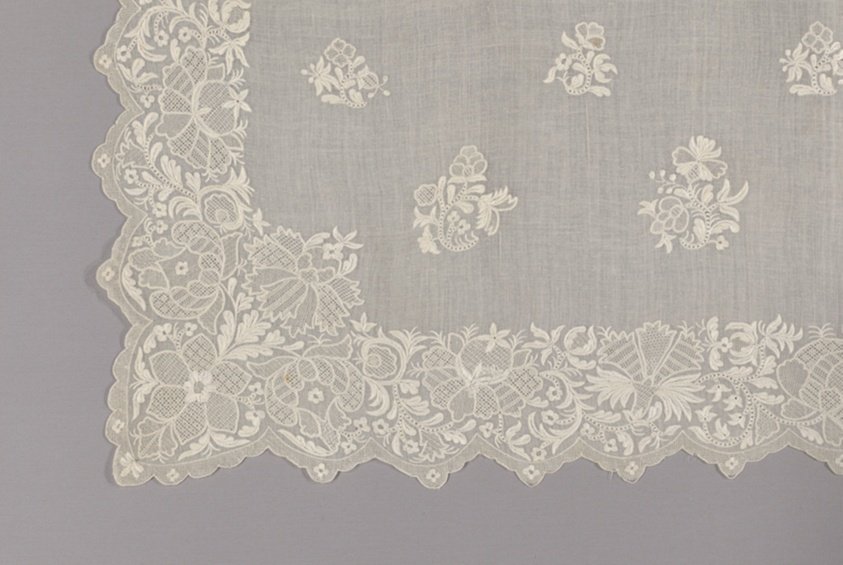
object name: Costume and Accessories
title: Apron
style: 18th Century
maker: England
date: 1760s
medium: Cotton, plain weave; drawnwork and embroidery in cotton, satin, buttonhole, chain, and double chain stitches with linen thread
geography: England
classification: textile; costume accessory; needlework (visual works); costume; dress (garment); clothing; apron (main garment); costume - embroidery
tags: flowers, floral patterns, floral, floral motifs